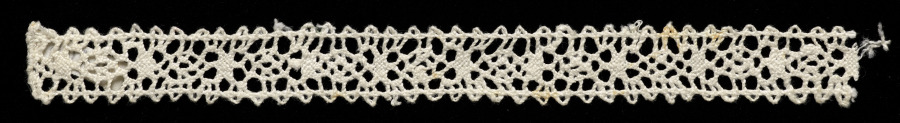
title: Lace Insertion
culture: Italy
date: 1600s–1700s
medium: Bobbin lace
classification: Lace